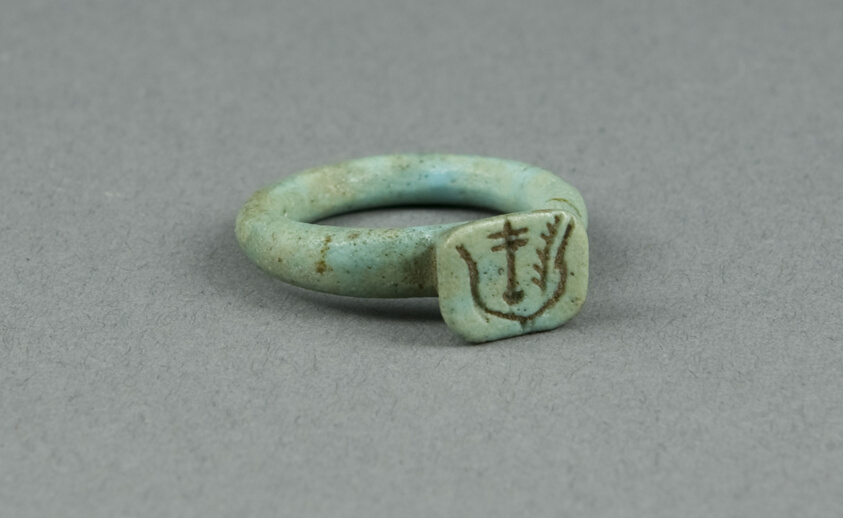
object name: Costume and Accessories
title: Ring: Bezel inscribed "Happy New Year"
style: late period (egyptian), egyptian, ancient, twenty-sixth dynasty, saite period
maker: Egyptian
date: Late Period, Dynasty 26 (664-525 BCE)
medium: Faience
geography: Egypt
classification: ring (jewelry); ceramics; jewelry; ancient art; costume; faïence (composite material)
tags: Hieroglyphs